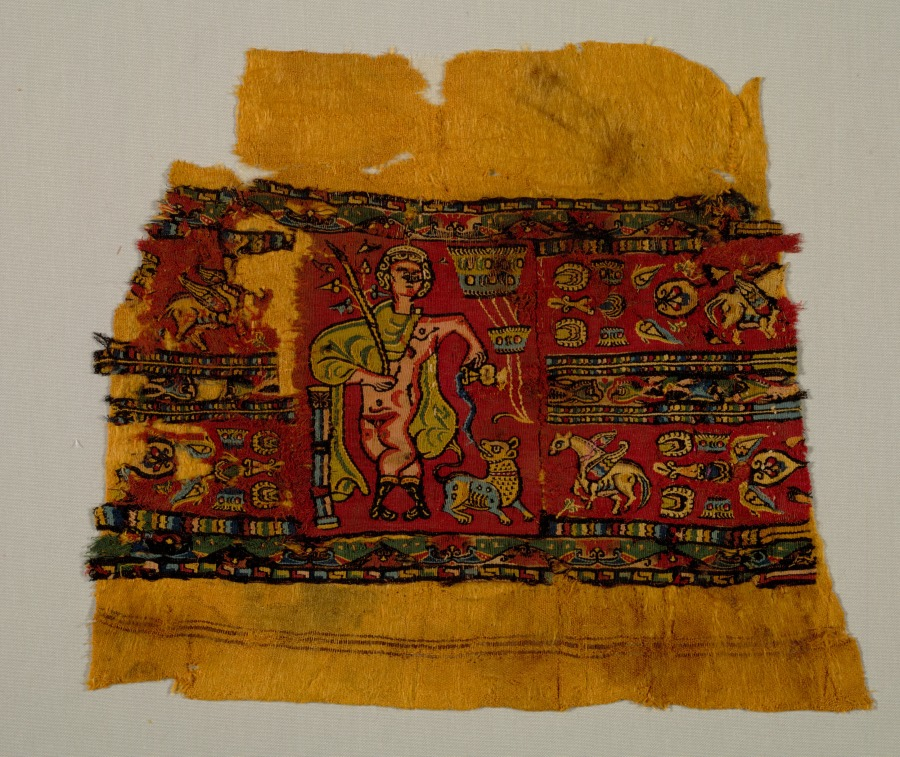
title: Sleeve from a Tunic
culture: Egypt, Umayyad period (661–750) or Abbasid period (750–1258)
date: 700s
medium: wool; plain weave with slit-tapestry weave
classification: Textile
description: Figures and winged animals from ancient Greece and Rome remained popular during the early Islamic period of the Umayyad and Abbasid dynasties. The naked figure could represent Dionysus, the Greek god of wine; he holds his thyrsus, a staff decorated with ivy leaves and pinecones, while pouring liquid from a small jug for the panther. These colorful designs probably adorned the sleeve and front or back of a tunic, a garment worn directly on the body for over 1,000 years, from Roman antiquity to the Middle Ages. Popular decorations were regularly reused and sewn onto new tunics, as can be seen on this winter garment made of wool.